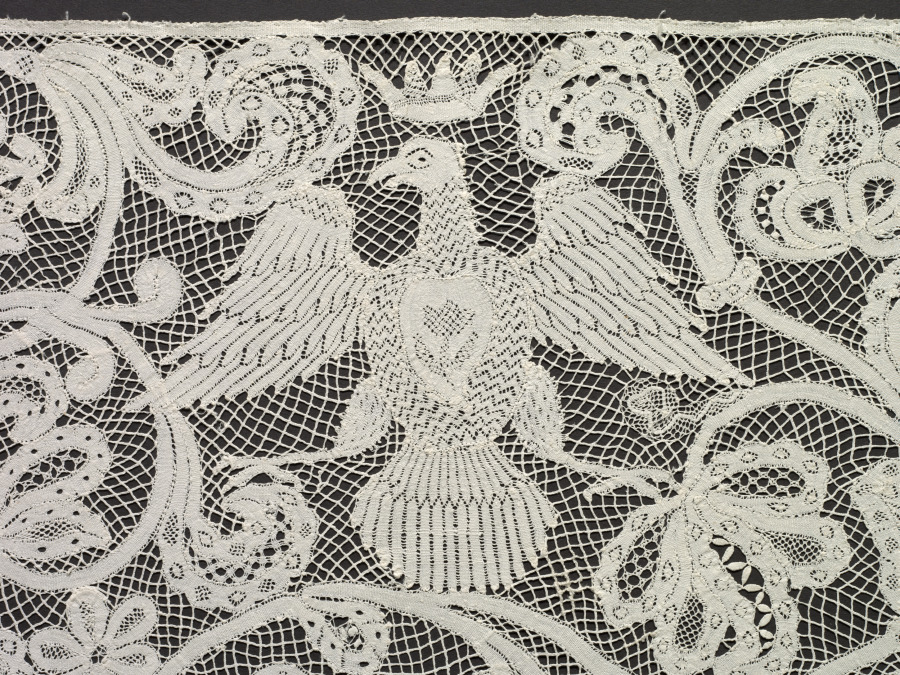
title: Lace Flounce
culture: Italy, Milan(?)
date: 1750–99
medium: Linen: bobbin lace (Punto di Milano)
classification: Lace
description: Being the most prestigious material, lace was used extensively by the 1600s for altar linen and for trimming priest’s albs, often incorporating finely rendered religious images amid blossoming vines. This alb flounce depicts scenes from the Old Testament story of Joseph, whose jealous brothers sold him to a caravan bound for Egypt. Joseph later interpreted dreams of the pharaoh, who made him ruler. When famine in Canaan caused Joseph’s ten brothers to travel to Egypt in search of food, they bowed down to him. After he revealed his identity, he forgave his brothers and God saved the family.